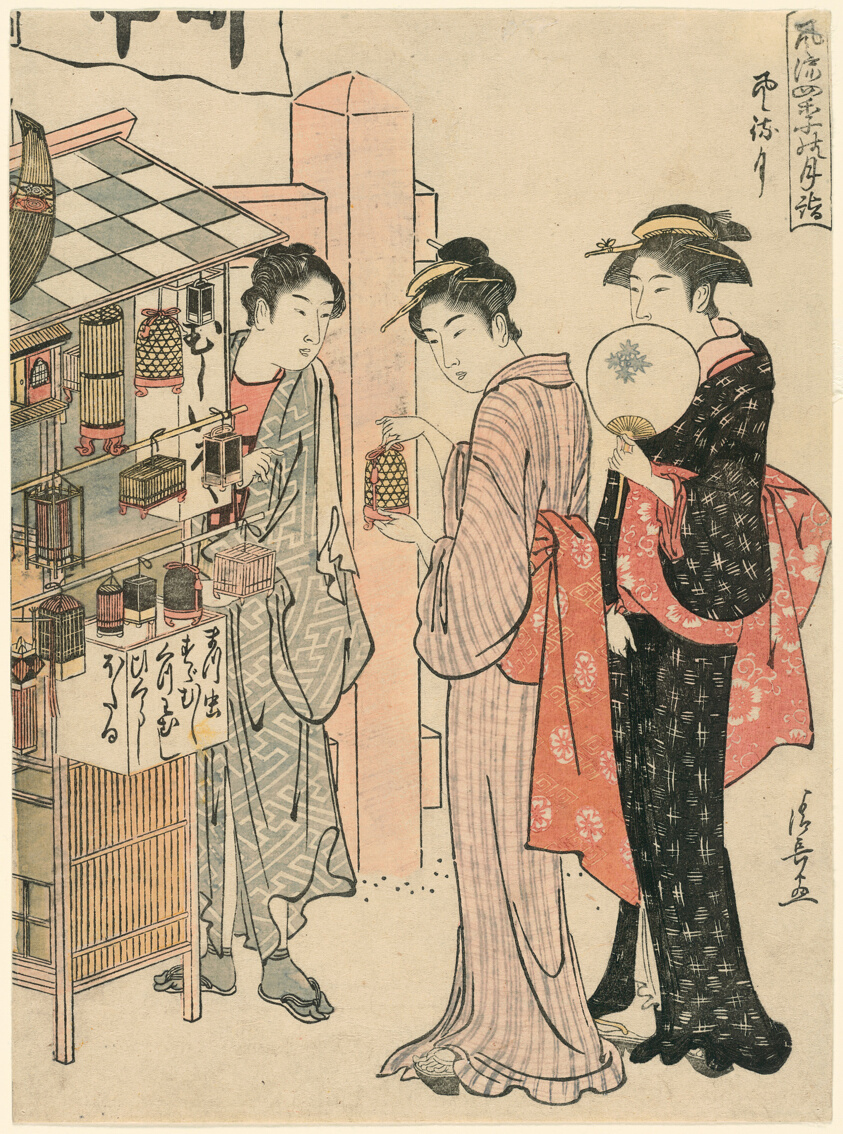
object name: Print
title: The Sixth Month (Kazemachizuki), from the series "Fashionable Monthly Visits to Sacred Places in the Four Seasons (Furyu shiki no tsuki mode)"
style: Japanese (culture or style)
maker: Torii Kiyonaga (Japanese, 1752-1815)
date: c. 1784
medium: Color woodblock print; chuban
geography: Japan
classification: woodblock print; print; asian art